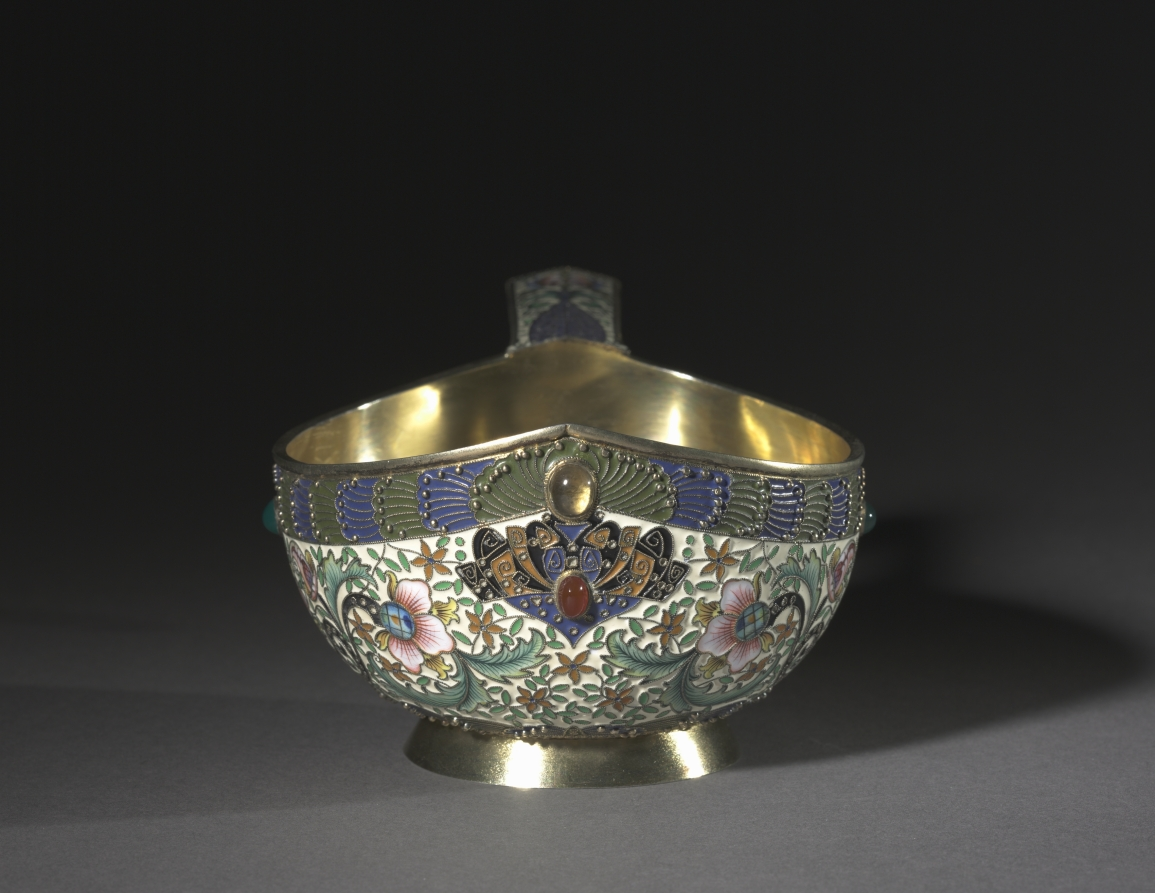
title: Kovsh (Cup)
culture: Russia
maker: House of Fabergé (Russian, 1842–1918)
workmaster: Feodor Ivanovich Rückert (Russian, 1840–1917)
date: 1896–1906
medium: silver gilt, enamel, cabochon gems, chrysoprases, carnelians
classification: Miscellaneous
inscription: inscribed on bottom: "CH" in script monogram (owner's initials).